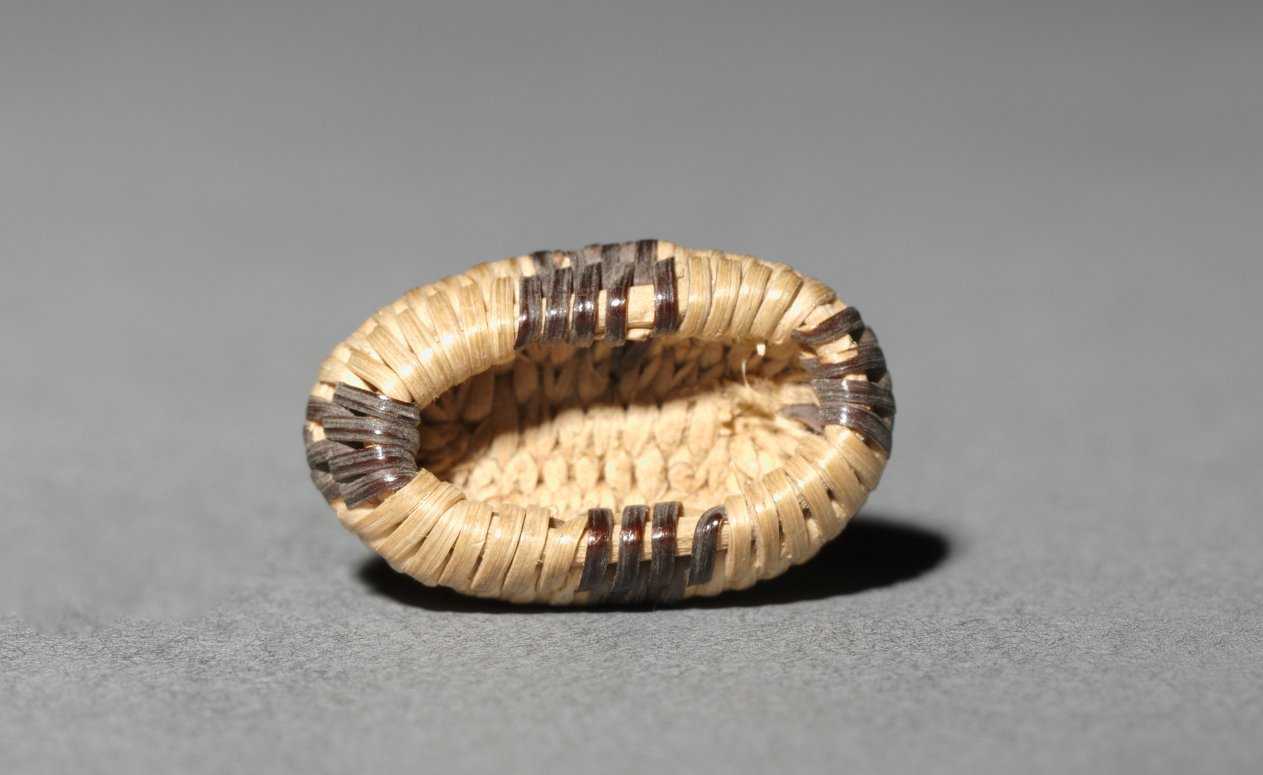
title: Miniature Basket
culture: America, Native North American, Southwest, Arizona, Akimel O'odham (Pima), Unassigned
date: before 1923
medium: plant fiber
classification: Basketry